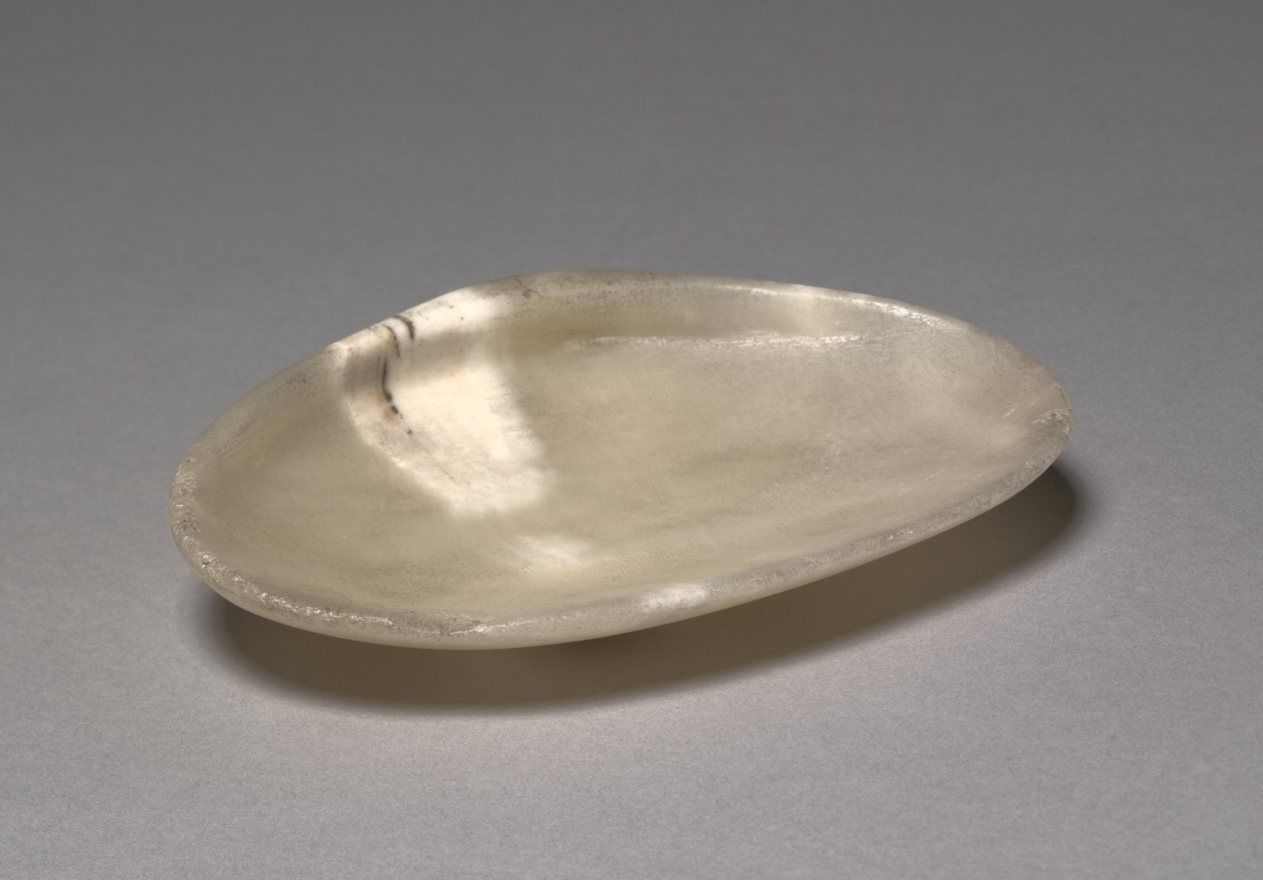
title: Dish in the Form of a Shell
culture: Egypt, New Kingdom (1540–1069 BCE), Dynasty 18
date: 1540–1296 BCE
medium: travertine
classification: Vessels